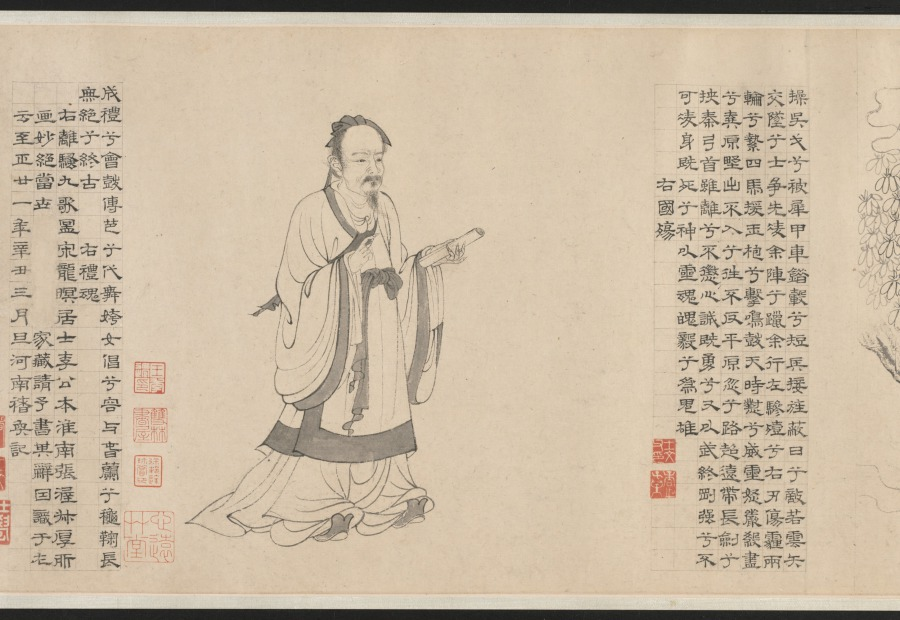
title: Nine Songs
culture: China, Yuan dynasty (1271-1368)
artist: Zhang Wo (Chinese, active c.1336–after 1364)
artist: Chu Huan (Chinese, active 1361)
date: 1361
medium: handscroll; ink on paper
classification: Painting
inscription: 7 colophons and 47 seals: 1 colophon, dated 1361, and 28 seals of Chu Huan 褚奐 (active c. 1361); 1 colophon, dated 1785, and 1 seal of Lu Shihua 陸時化 (1714-1779); 2 seals of Lu Yü-ch'ing (18th c.); 1 colophon, dated 1935, of Ye Gongchuo 葉恭綽 (1881-1968); 1 colophon, dated 1935, of Wu Hufan 吳湖帆(1894–1968); 1 colophon, dated 1938, and 1 seal of Wang Tongyu 王同愈 (1856-1941); 1 colophon, dated 1941, of Wu Huayuan 吳華源 (1893-1972); 1 colophon, dated 1942, and 9 seals of Xu Bangda 徐邦達 (1911–2012); 1 colophon, dated 1942, of Lang Jingshan 郎靜山 (1892-1995); 1 colophon, dated 1944, of Tang Yun 唐雲 (1910-1993); 6 seals of Wang Jiqian [C.C. Wang] 王季遷 (1907–2003).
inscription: Text of The Nine Songs written by Chu Huan at the end of each section.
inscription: 右離騷九歌圖，宋龍溟居士李公本，淮南張渥叔厚所畫妙絕當世。家藏請予書其辭目識于左。至正二十一年辛醜三月旦河南褚奐記。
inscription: Colophon by Lu Shihua 陸時化 (1714–1789): This scroll is fortunate to have been handed down from collections of the right people. Now, after 500 years, its condition is as good as when it was painted. I acquired this from Mr. Shen Guiyu [1673-1769], the President of the Board of Rites. The label is in his handwriting when he was 95 years old. I submit that Chu Huan (t. Shiwen) of the Yuan Dynasty was a native of Qiantang. His "seal" and li writings are in the style of Wu Rui. For example, in [Chu Kuei's] Ming ji lu [A list of masterpieces] is recorded the stele commemorating the restoration of the prefectural school of Kun-shan, the text of which was composed by Yang Weizhen in the twenty-first year of Zhizheng [1361]; and the calligraphy as well as the title in li style was by Chu Huan, who was at that time an assistant judge of the prefecture of Haining in the circuit of Hangzhou. Zhang Wo's zi is Shuhou (叔厚). His literary name is Zhen Qisheng (贞期生). According to [Gu Ying's] Yu shan cao tang ya jii, he liked to paint in the bai-miao or the "pure delineation" style after the method of Li Longmian [Li Gonglin 李公麟], which finds no peer among the ancient masters. This is agreed upon [by Pei Ch'iung] in his Qing jiang zhi who praised [Zhang Wo] as being quite learned and well-versed in many branches of the arts, especially figure painting. Recorded by Lu Shihua [The mountain dweller], listening to the pine, in the twelfth month of the yisi year [1785].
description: Painted in the baimiao, or fine-line drawing style, this ancient work demonstrates the literati’s use of abstract calligraphic brushwork for self-expression. The subject of the “Nine Songs”—songs associated with shamanistic rituals in the ancient Chu kingdom—had traditionally provided artists with myths and legends that they could explore and reinterpret in their own works.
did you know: Divided into eleven sections, the scroll contains illustrations by painter Zhang Wu followed by a transcription of the relevant verse by calligrapher Chu Huan.